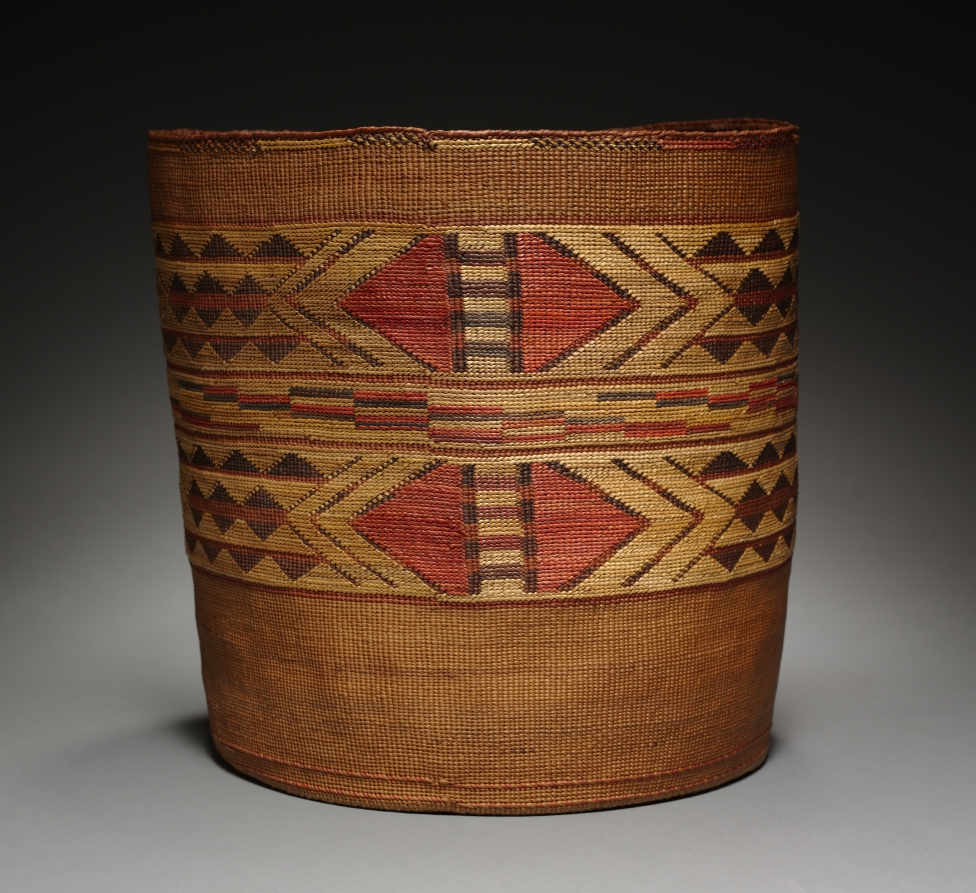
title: Cooking Basket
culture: Northwest Coast, Tlingit, late 19th Century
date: late 1800s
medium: Spruce root; twined, false embroidery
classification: Basketry